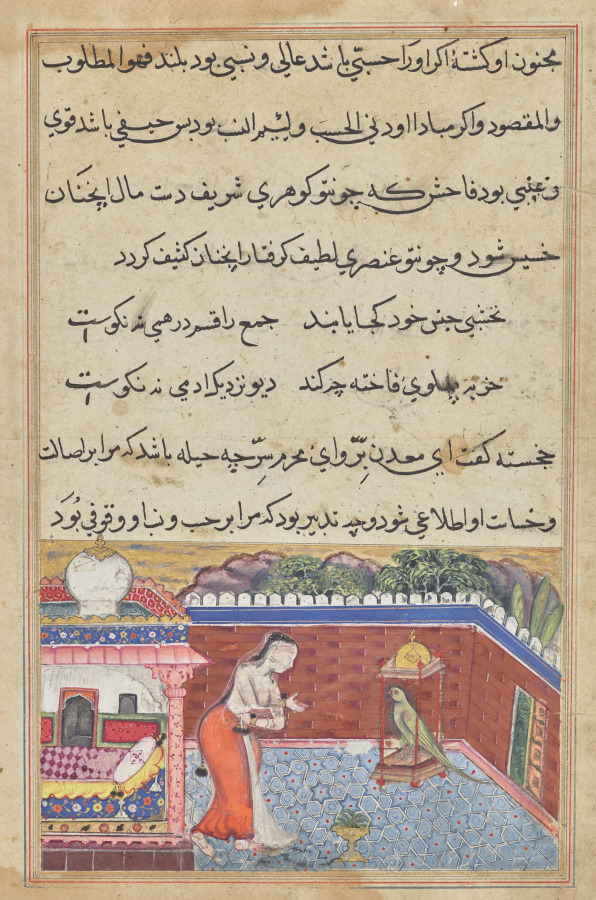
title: The parrot addresses Khujasta at the beginning of the thirty-first night, from a Tuti-nama (Tales of a Parrot)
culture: Mughal India, court of Akbar (reigned 1556–1605)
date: c. 1560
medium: gum tempera, ink, and gold on paper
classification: Painting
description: On the thirty-first of fifty-two nights, Tuti the talking parrot begins to tell Khujasta a moralizing story about a blue jackal who, through trickery, briefly became the emir of wild beasts. The original underdrawing in black and red is visible beneath the flaked paint on Khujasta’s face and upper body.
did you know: The painting depicting the blue jackal is in the Edwin Binney 3rd Collection of the San Diego Museum of Art (1990.273).